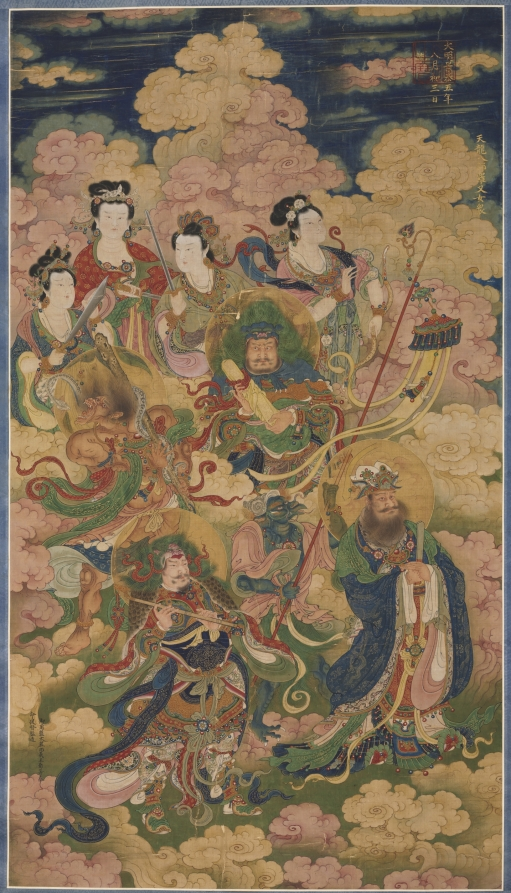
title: The Eight Hosts of Deva, Naga, and Yakshi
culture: China, Ming dynasty (1368–1644)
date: 1454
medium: hanging scroll; ink and color on silk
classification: Painting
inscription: 大明景泰五年八月初三日施 [印] 廣運之寳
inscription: 御用監太監尚義王勤等奉命提督監造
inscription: 天龍八部羅叉女衆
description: The grandest of the Buddhist mortuary rites is the Water-Land (shuilu) ritual. This esoteric ceremony is conducted for the salvation of “all souls of the dead on land and sea.” The ostentatious ritual was performed for imperial ancestors and high officials from the Song (960–1279) to the Ming dynasties and drew large crowds. On the second day of the weeklong ceremony, paintings are hung in the inner altar. This scroll represents the Eight Hosts of Celestial Nagas and Yakshis as described in the Lotus Sutra. Together with CMA 1973.70.1, it belongs to a set of 36 Water-Land ritual paintings that are the finest works of their types known from the Ming period. With their bright, opaque color and fine-line gilt decoration intact and unfaded, both paintings share a remarkable state of preservation.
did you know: The Naga is on the lower right dressed as a king with gold dragons on his blue robe.